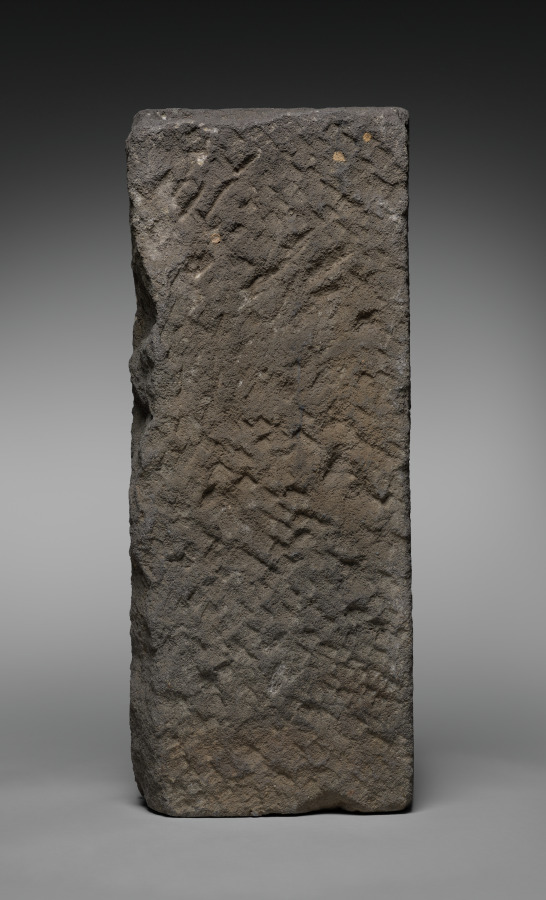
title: Goddess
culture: Indonesia, Central Java, Boyolali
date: 800s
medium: volcanic stone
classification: Sculpture